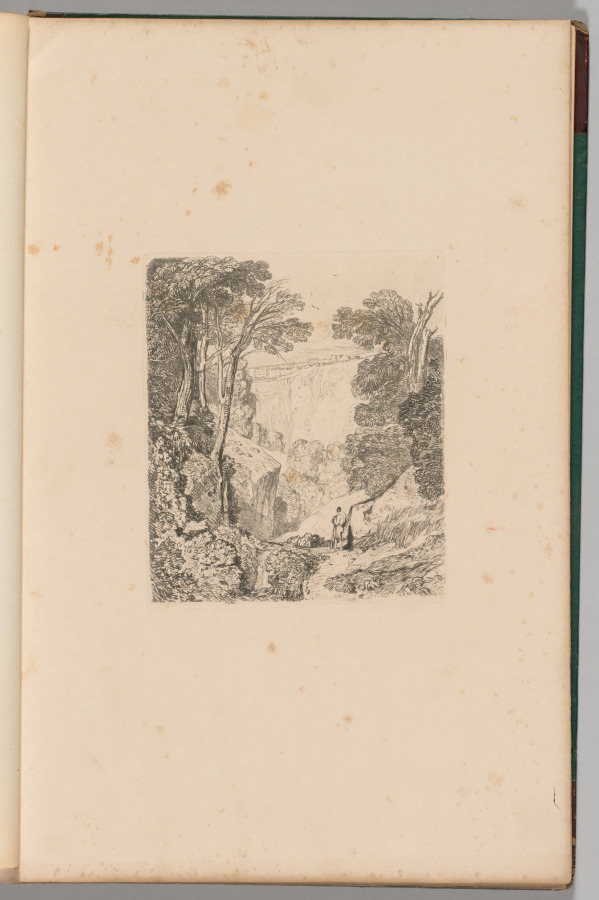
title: Liber Studiorum: Plate 2, View of Clifton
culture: England, 19th century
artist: John Sell Cotman (British, 1782–1842)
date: 1838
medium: softground etching, from a bound volume containing 48 plates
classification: Bound Volume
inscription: In plate, within image: upper right: 2; in plate, below image: Clifton J.S. Cotman